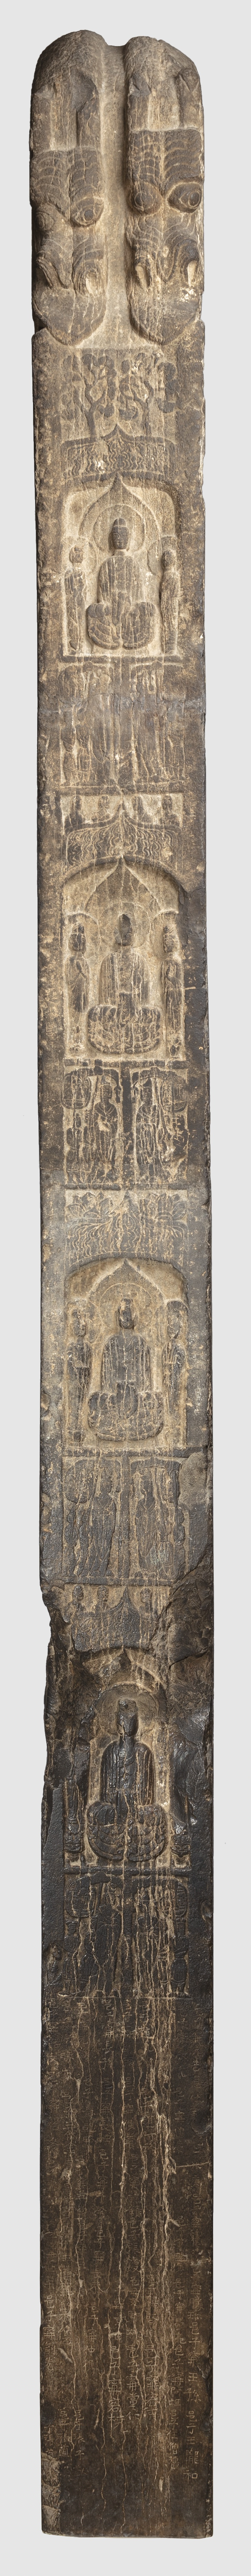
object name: Religious/Ritual Object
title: Buddhist Votive Stele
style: Chinese (culture or style)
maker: China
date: Western Wei dynasty (A.D. 535–557), dated A.D. 551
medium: Stone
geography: China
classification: stone (unidentified); stone; sculpture; asian art; ritual objects